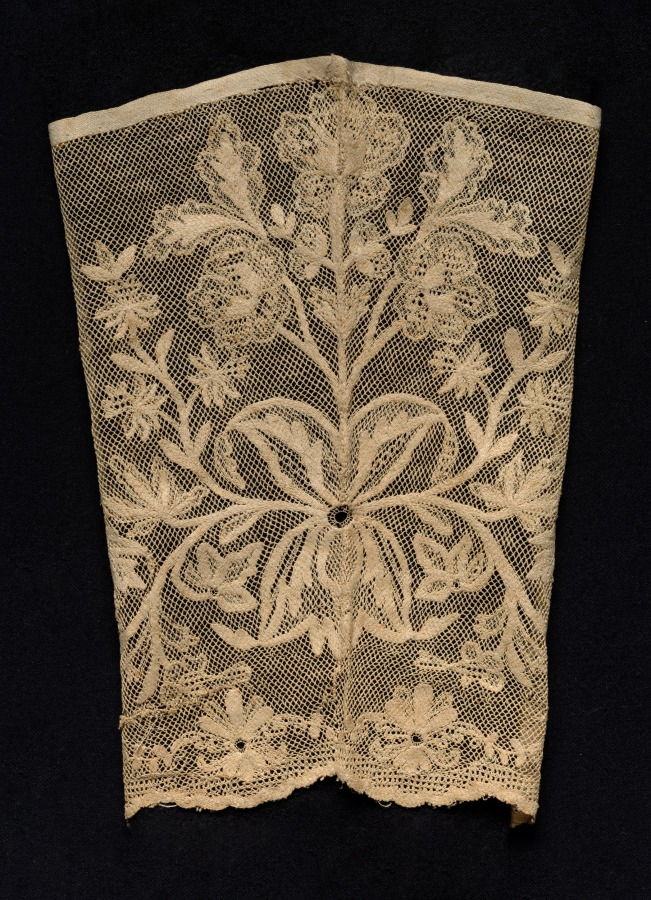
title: Cuff with Floral Vines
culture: Unassigned, 1800s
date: 1800s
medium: Bleached linen (est.): needle lace, filet/lacis (knotted ground and darned in one direction)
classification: Lace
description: In this lace cuff (one of a set, see 1936.225), scrolling vines with budding flowers emerge from a tied bow, creating a stylized bouquet. A scrolling vine with budding vegetation or a tendril motif is a recurring pattern in needle lace. The frequent use of the motif, adapted in lace from different centuries and regions, suggests that it was found in a pattern book.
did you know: From the 15th century, lace cuffs were among the most popular ways to wear and display this costly textile.